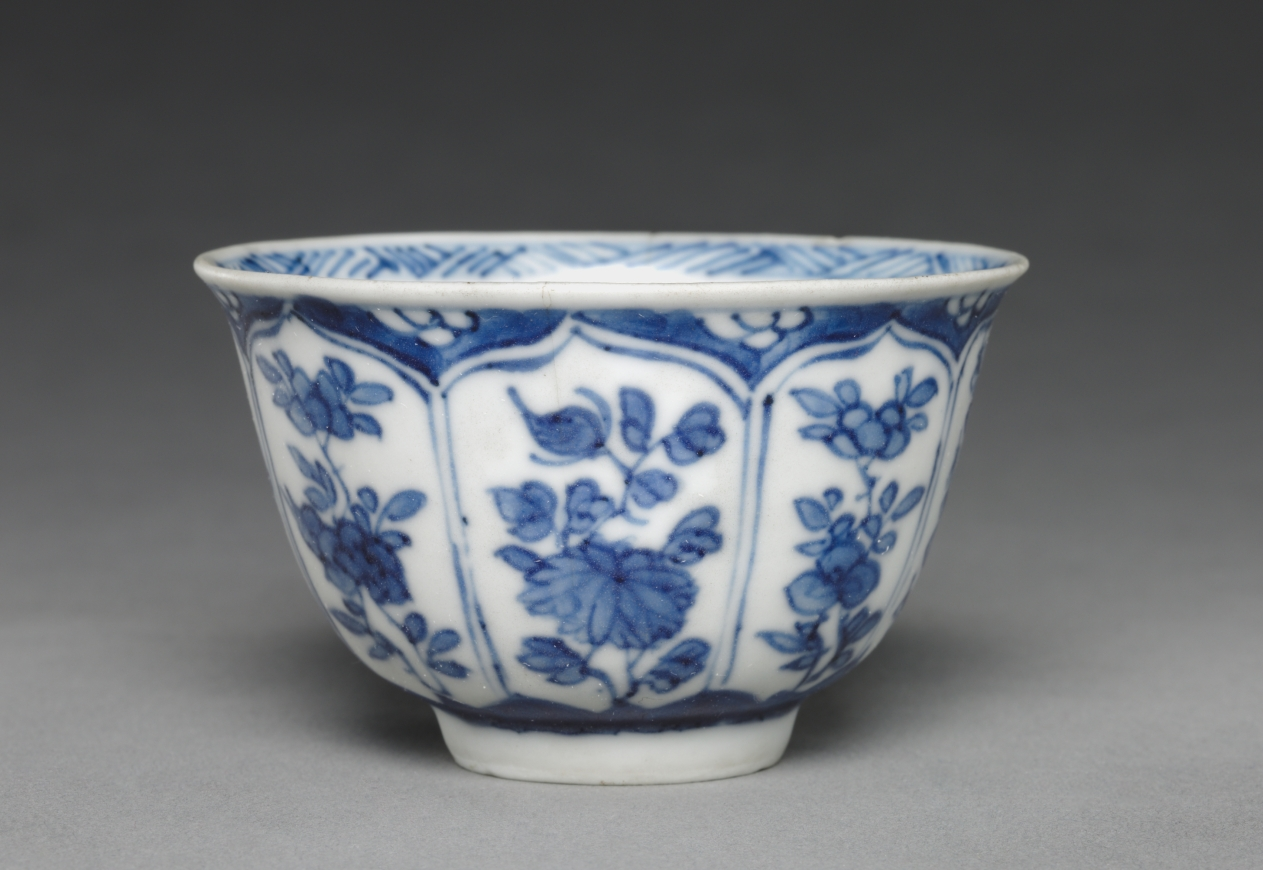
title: Tea Cup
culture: China, Qing dynasty (1644-1911)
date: c. 1690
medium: porcelain with blue and white decoration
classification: Ceramic